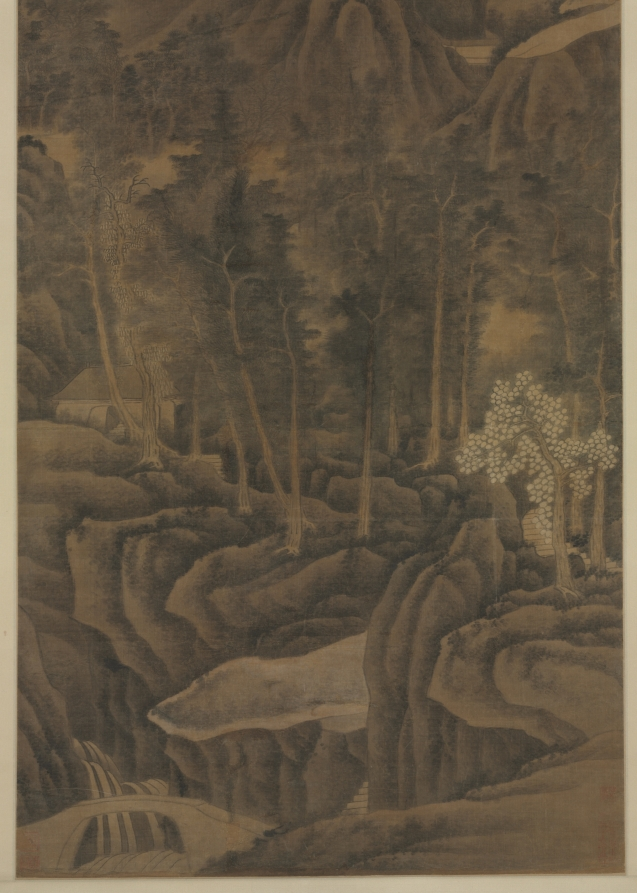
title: Landscape in the Style of Dong Yuan and Juran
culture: China, Qing dynasty (1644-1911)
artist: Gong Xian (Chinese, 1599–1689)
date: c. 1650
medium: hanging scroll, ink with white pigment on silk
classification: Painting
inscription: 畫家董巨，實開南宗。既無剛根之氣，復無刻畫之跡。後之作者或以才見，或以法稱。唯董巨則幾乎道矣。然逞才則離法，泥法則叛道。至道無可道。說者謂即歛才就法之謂道。問之董巨，而董巨不知，忽乎微矣。此幅余二十年前舊作。藏之新安吳氏。吳君晉明寶之若家珍。後携之金陵。命余題識。余因與晉明論畫及此，并紀之。非敢曰此效法董巨而有得焉者也。 庚戌冬杪半畝居人龔賢。 [印]龔半千; 野遺賢; [左下]龔賢; [上]可能另有龔賢一印。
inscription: 2 additional seals of Cheng Qi 程琦 (1911–1988)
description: Towering peaks and unfolding ranges are piled up and overlaid with layer after layer of brushwork to give an overall dense, dark, and even melancholic effect. Gong Xian created a personal style of landscape, which departed greatly from his models Dong Yuan and Juran. The tension between tradition and individuality had been a topic of interest for the Chinese artist. As Gong Xian writes in his inscription: "Painters of later periods may be known for their natural talents or praised for their observance of established traditions. . . . However, those who indulge in showing off their talent will deviate from the tradition, while those who adhere to tradition will alienate themselves from the Dao. The supreme Dao is inexplicable in words. . . ."